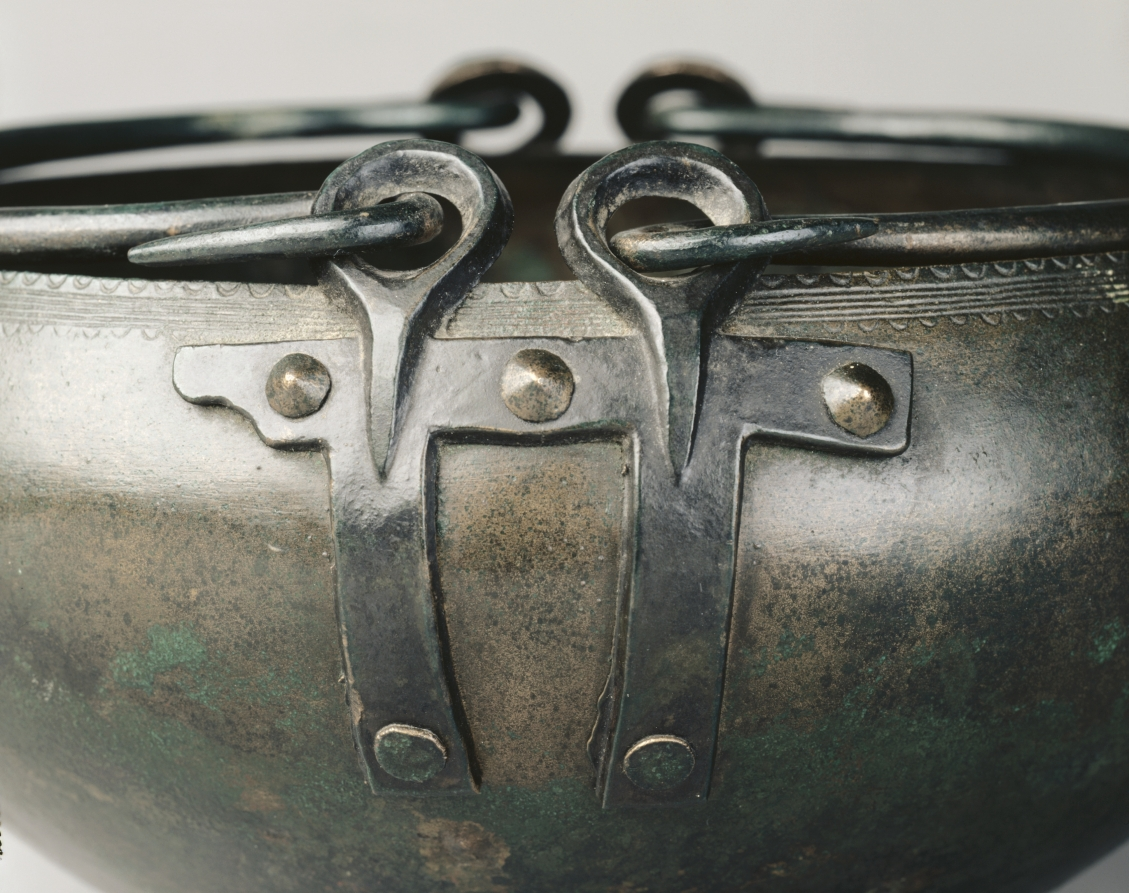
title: Ritual Cauldron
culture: Hungary, Bronze Age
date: c. 1000–900 BCE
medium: bronze, hammered, cast and wrought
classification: Metalwork